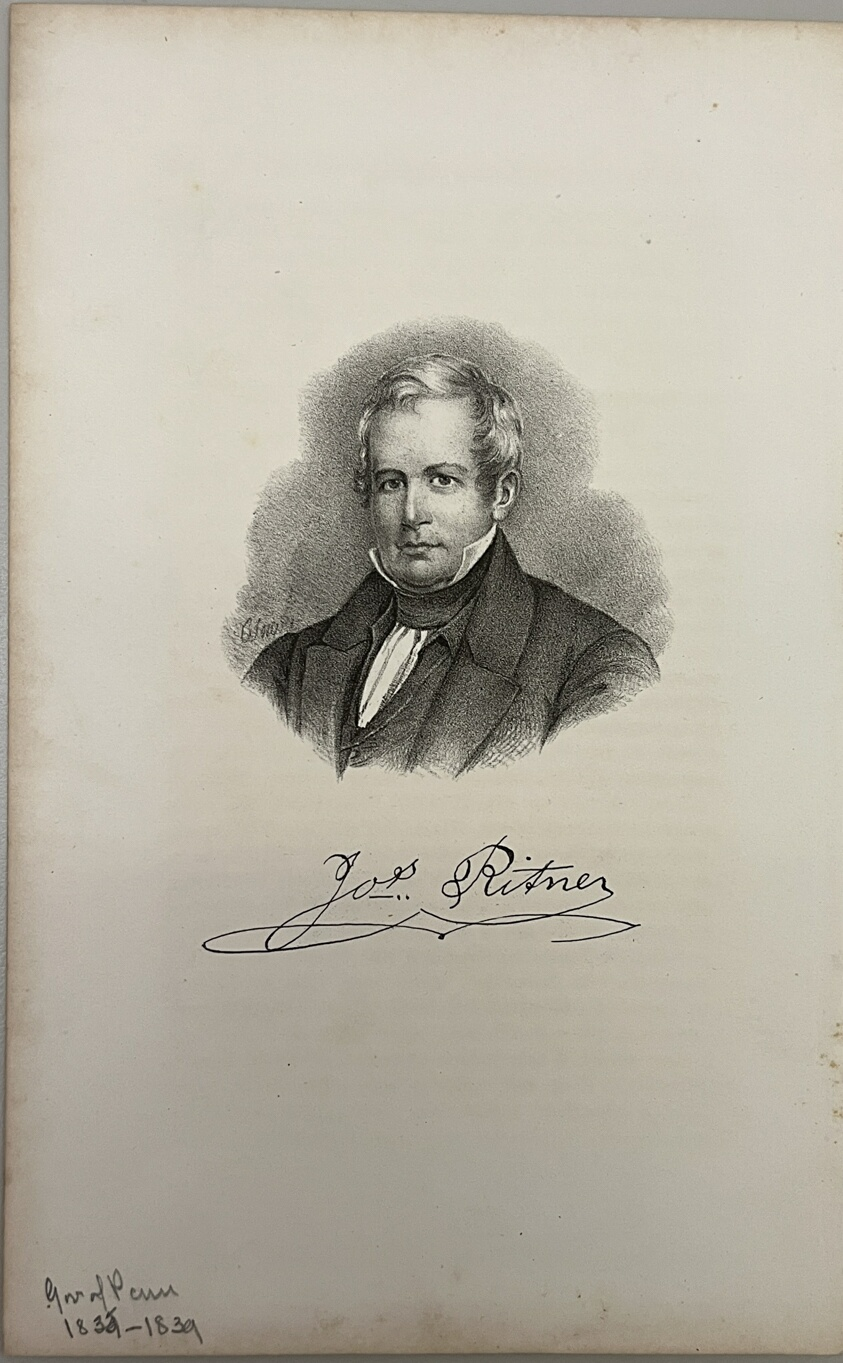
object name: Print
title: Joseph Ritner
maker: Artist Unknown (Likely American, 19th century)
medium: Etching on paper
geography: United States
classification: reproduction; print; prints and drawing